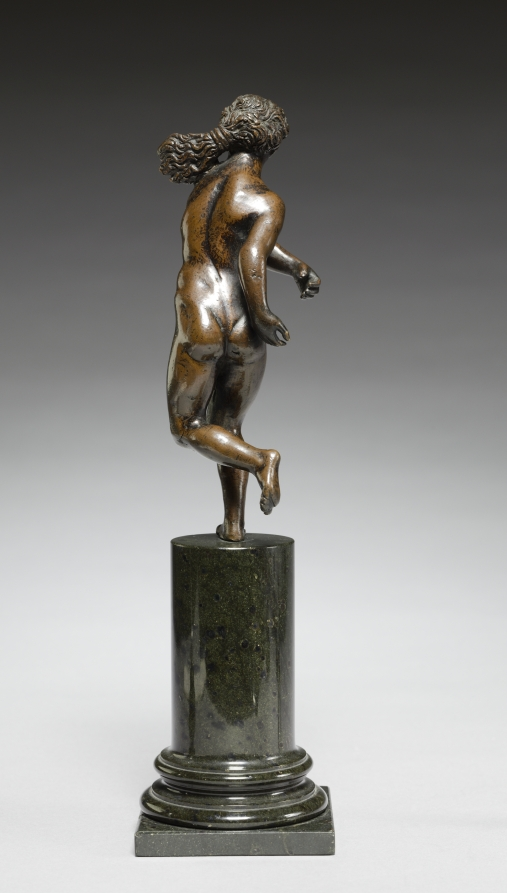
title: Thetis Running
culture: Italy, Ravenna, 16th century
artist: workshop of Severo da Ravenna (Italian, c.1496–c.1543)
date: c. 1527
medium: bronze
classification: Sculpture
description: The complex, corkscrew-like twist of the figure’s body around a central axis indicates that this work was meant to be seen and admired in the round. Producing a sculpture of a body in motion posed a challenge for Renaissance artists, and complex compositions like this were often adapted from prints and paintings. The pose of this bronze statuette may have been inspired by a print representing the Greek sea goddess Thetis. Thetis was courted by the gods Zeus (Jupiter) and Poseidon (Neptune), but was eventually married to the mortal Peleus; the Greek hero Achilles was their son. In the print, Thetis pours water from a jug held at her hip and her upraised foot rests on a large shell, both referencing her role as sea goddess. The statuette’s lack of identifying attributes encourages the viewer to focus instead on the figure’s graceful spiraling form, and the sculptor’s skill in creating a convincing sense of movement.